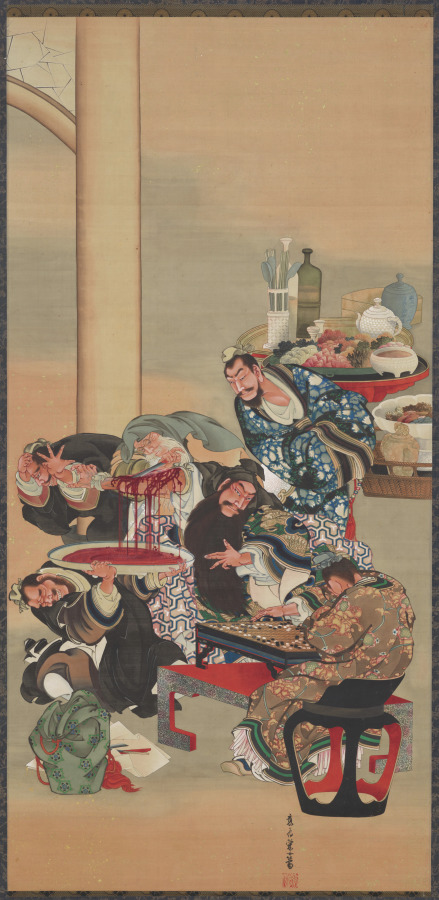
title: Operating on Guan Yu's Arm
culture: Japan, Edo period (1615–1868)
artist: Katsushika Ōi (Japanese, c. 1800-after 1857)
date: 1840s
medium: hanging scroll; ink, color, and gold on silk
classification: Painting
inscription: 款記「應為栄女筆」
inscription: 「葛しか」白文方印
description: Ukiyo-e artists’ subject matter extended to popular literature. Katsushika Ōi used color to great effect in her gruesome version of an episode from a 14th-century Chinese novel, Romance of the Three Kingdoms. Ōi portrayed the passage in which legendary 3rd-century military leader Guan Yu undergoes a bone scraping to remove poisons received from an arrow wound. In this sensationalist portrayal, Guan Yu’s attendants cower at the sight of his bloody arm while he remains unflinchingly focused on his game. As a woman, Ōi was an outlier in her era, but her talent was allowed to shine due to collaboration with her father, Katsushika Hokusai (1760–1849), the famed designer of the print known as The Great Wave.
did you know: This is the largest surviving painting by the artist.